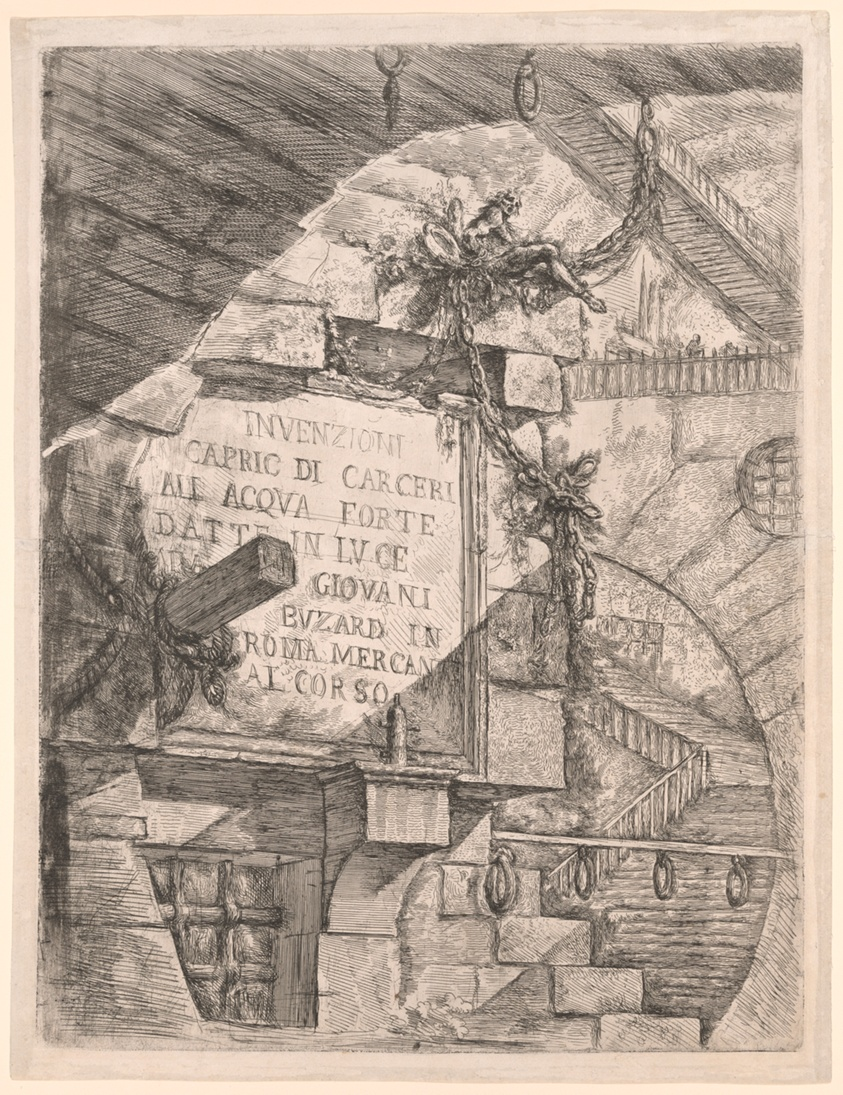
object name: Print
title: Title Page from Imaginary Prisons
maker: Giovanni Battista Piranesi (Italian, 1720-1778)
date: 1749–50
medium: Etching with engraving and sulphur tint or open bite on ivory laid paper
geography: Italy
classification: etching; print; prints and drawing